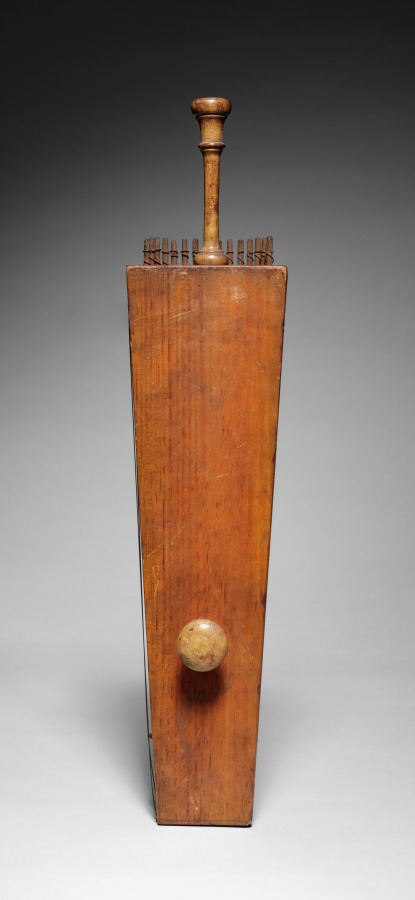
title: Psaltery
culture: China, Qing dynasty (1644-1911)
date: 1800s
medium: wood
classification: Musical Instrument